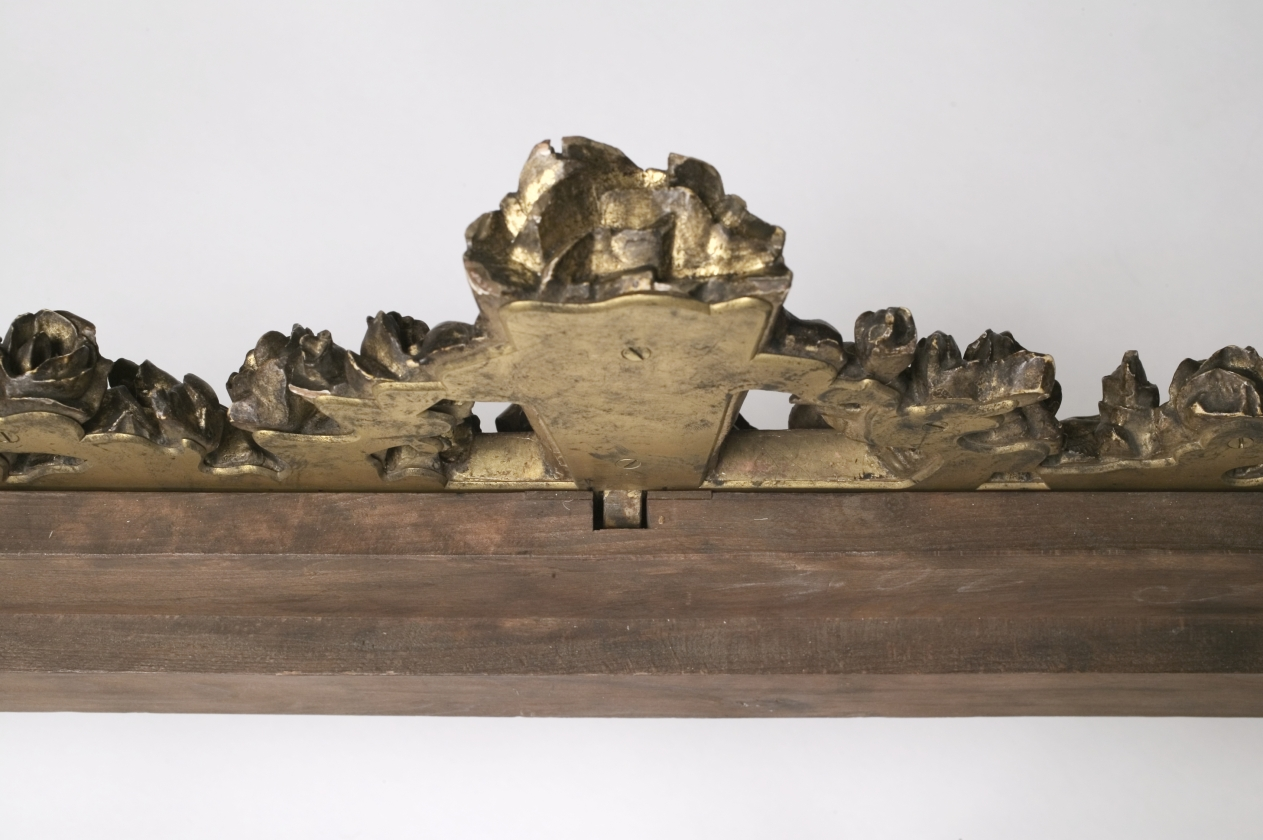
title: Bed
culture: France, 18th century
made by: attributed to Georges Jacob (French, 1739–1814)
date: 1700s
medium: gilded wood and embroidered satin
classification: Furniture and woodwork